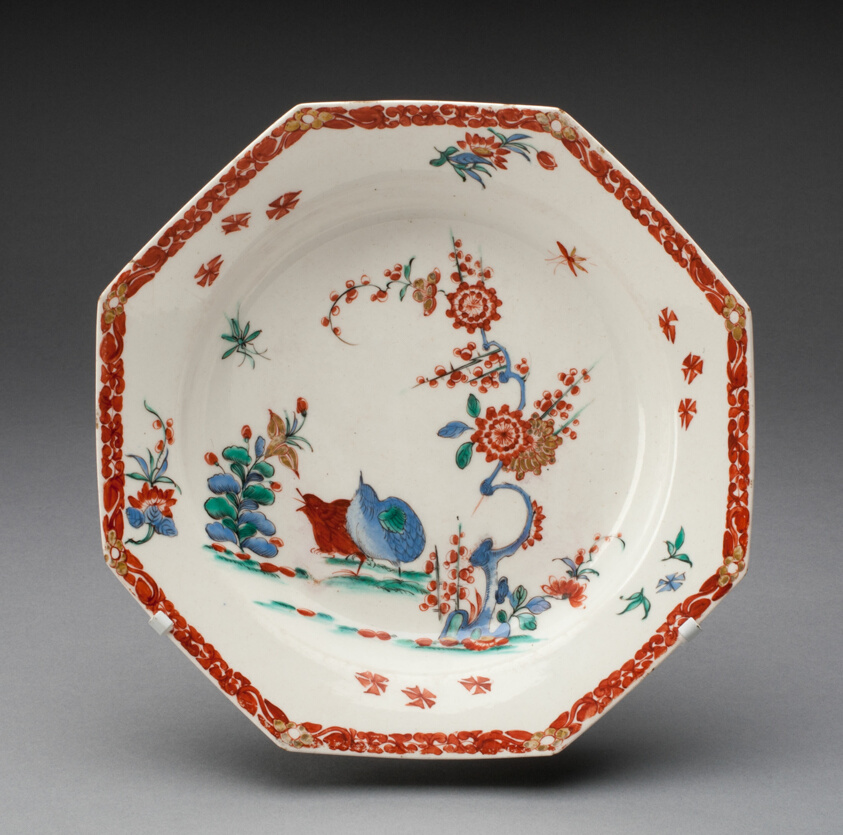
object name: Ceramics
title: Soup Plate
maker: Bow Porcelain Factory (London, England, 1744-1775)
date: c. 1755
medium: Soft-paste porcelain, polychrome enamels and gilding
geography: Bow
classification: plate (general, dish); dish (vessel); porcelain; european decorative arts; ceramics